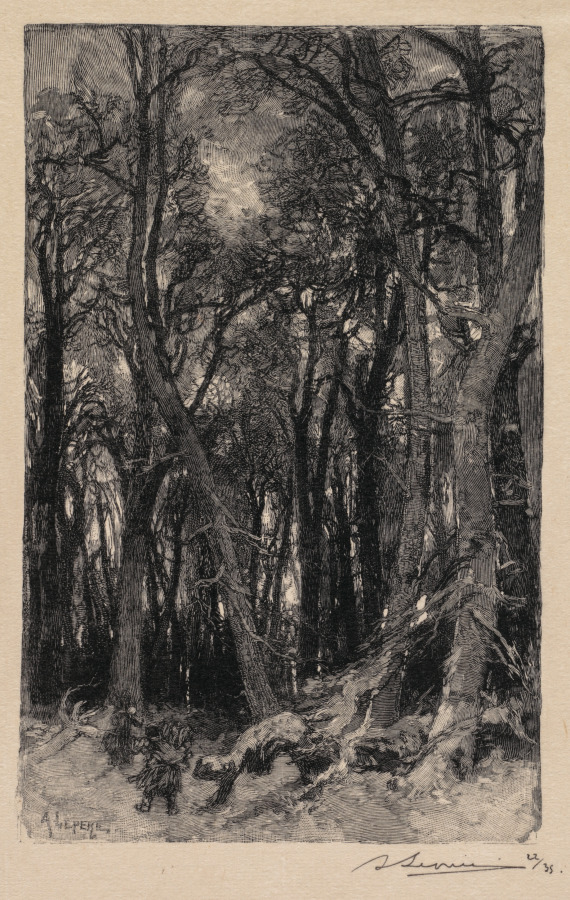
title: Fontainebleau Forest: Bas-Bréau (La Forêt de Fontainebleau: Le Bas-Bréau)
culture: France, 19th century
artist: Auguste Louis Lepère (French, 1849–1918)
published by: A. Desmoulins, Published in Revue Illustrée, 1887–90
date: 1890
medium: wood engraving from bound volume of 34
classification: Bound Volume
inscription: Below image, lower right, in black ink: ALepère 22/35; on block, lower left: ALEPÈRE; On window mat, lower right, in graphite: Le Bas-Bréau